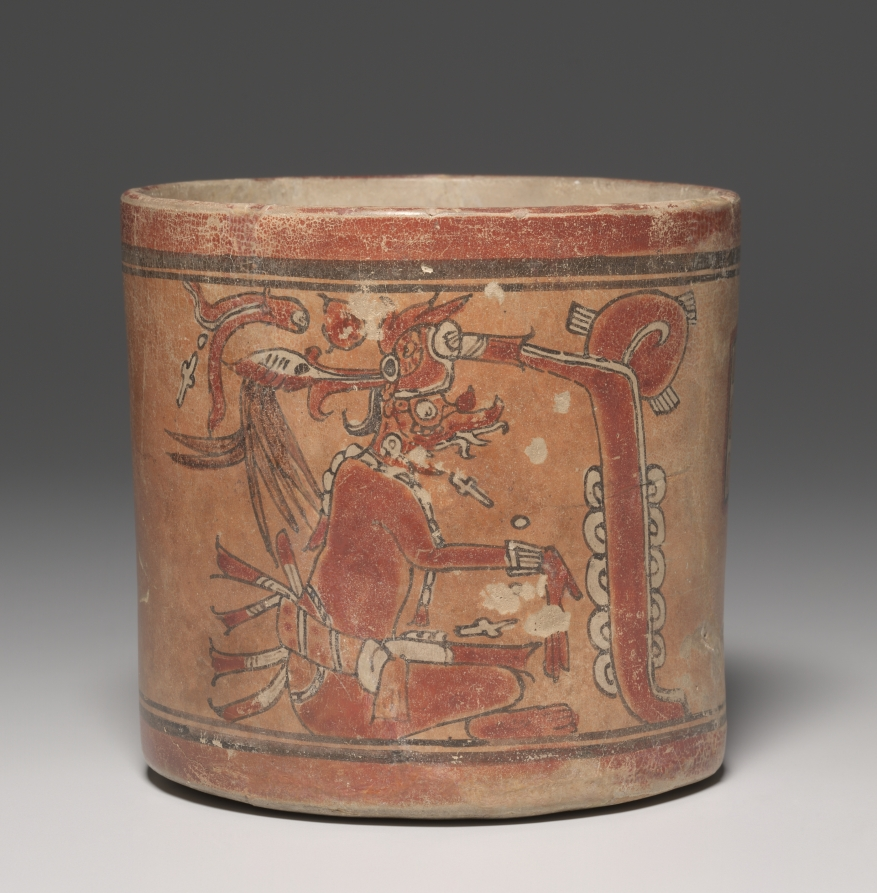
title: Cylinder Vessel with Deities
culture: Guatemala, Kixpek, Maya (Chamá) style (250-900)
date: 600–900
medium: earthenware with colored slips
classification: Ceramic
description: Between AD 600 and 900, Maya cities and towns mushroomed in number, interacted, and competed. Since a distinctive ceramic painting style was part of many centers' identities, the number of styles exploded and painted pottery became a hallmark of the era. This vessel, painted with a ruler's patron deity (God K), is of a style produced briefly in one area of Guatemala's Chamá Valley.